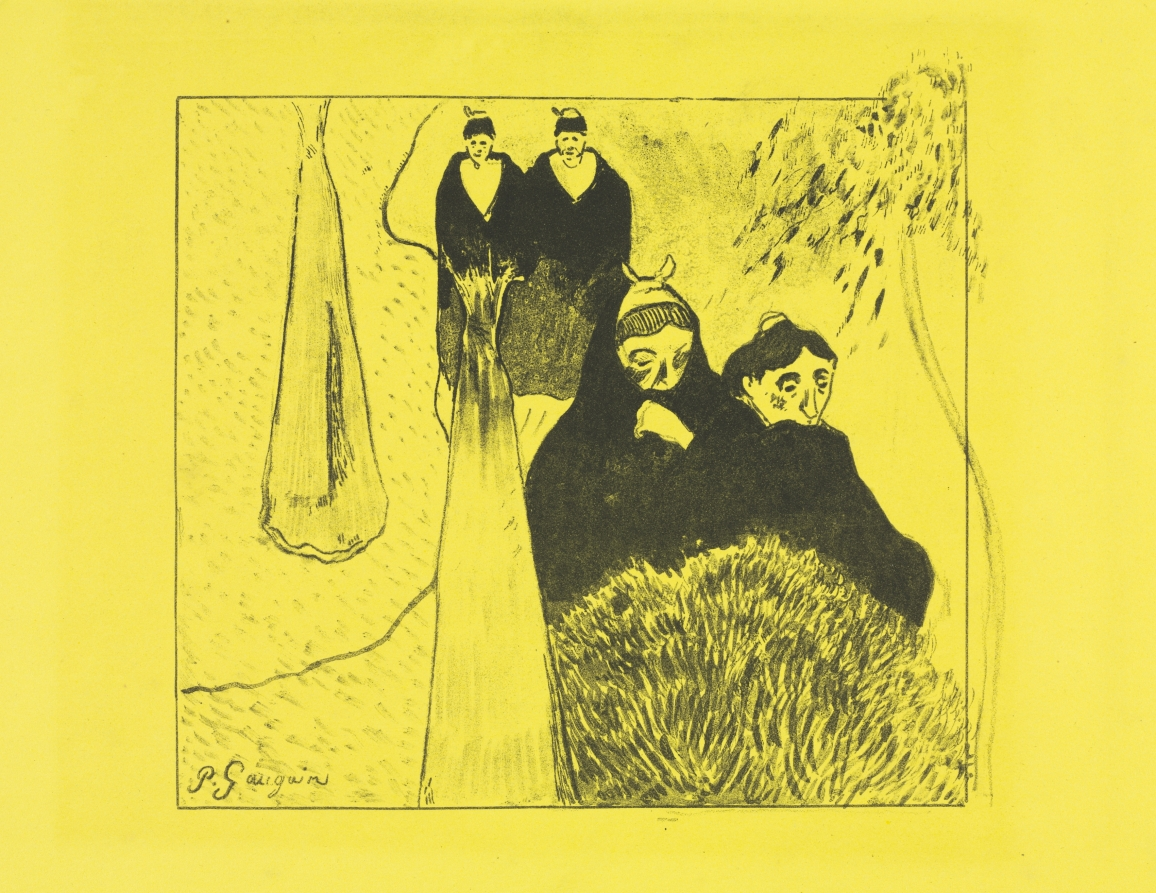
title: Volpini Suite: Old Women of Arles (Les Vieilles Filles [Arles])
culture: France, 19th century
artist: Paul Gauguin (French, 1848–1903)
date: 1889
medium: zincograph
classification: Print